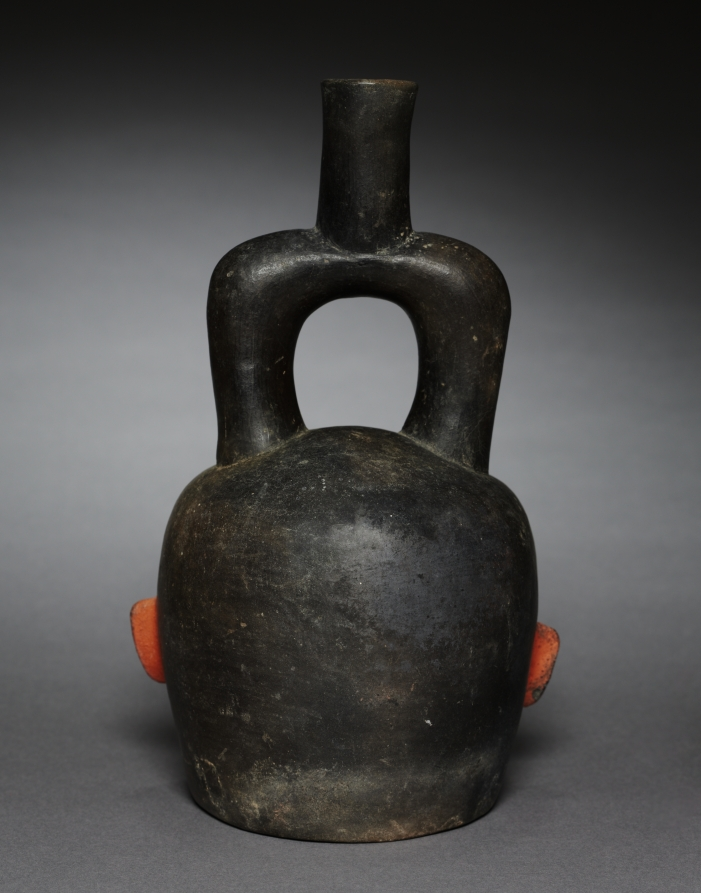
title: Deity-Head Vessel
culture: Peru, North Coast, Tembladera people, Early Horizon (900-400 BCE)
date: 900–400 BCE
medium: ceramic with pigment applied after firing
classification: Sculpture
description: This is a stirrup-spouted vessel shaped as the effigy of a deity head with bulging, circular eyes from which hang pendants. A fanged, bandlike mouth is arranged horizontally on top of a projecting chin that is tipped with a three-dimensional, zoomorphic head. A chin strap reaches between two modeled knobs that double as ear ornaments, and the underpart of the chin is ornamented with chevrons. The face is painted red, yellow, and white over the burnished gray-black surface of the ceramic.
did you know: The Tembladera style is one of several very early styles that developed on the northern desert coast of Peru.